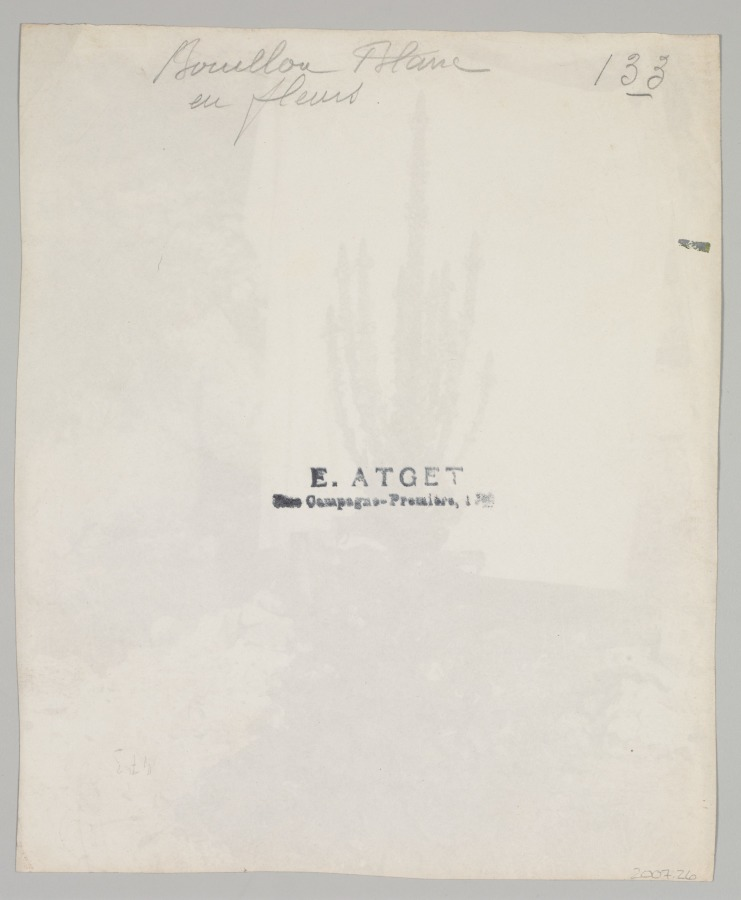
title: Mullein in Bloom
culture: France, 20th century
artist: Eugène Atget (French, 1857–1927)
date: c. 1897–1899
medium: albumen print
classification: Photograph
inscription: Written in pencil on verso: "Bouillon Blanc/En Fleur 133"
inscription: Black stamp on verso of print: E. Atget/Rue Campagne-Premié re, 17 bis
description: Atget produced architectural details, views of historic Paris, landscapes, and botanical images for use by painters and illustrators. Despite being a product of the 19th century, he was greatly admired by the avant-garde photographers of the 1920s. Modernists esteemed the straightforwardness of his photographs, while the Surrealists found inspiration in their evocative power. An artist or illustrator using this image of a common plant used in herbal remedies would have ignored the landscape background. But the Surrealists would have appreciated the unexpected, unintended surrealism of its odd juxtaposition of sheet, plant, and landscape.